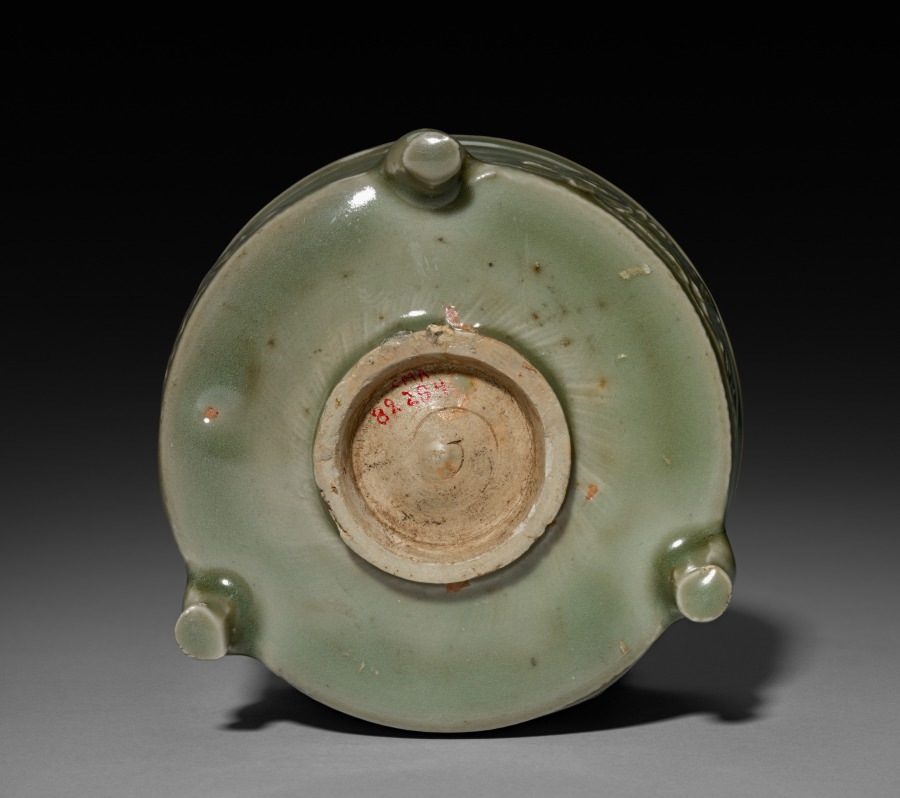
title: Incense Burner in Form of Archaic Lian with Peonies in Relief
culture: China, Zhejiang province, Yuan dynasty (1271-1368)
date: 1300s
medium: Glazed porcelain with molded decoration, Longquan ware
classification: Ceramic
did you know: In East Asian art, peonies traditionally symbolize prosperity and wealth.